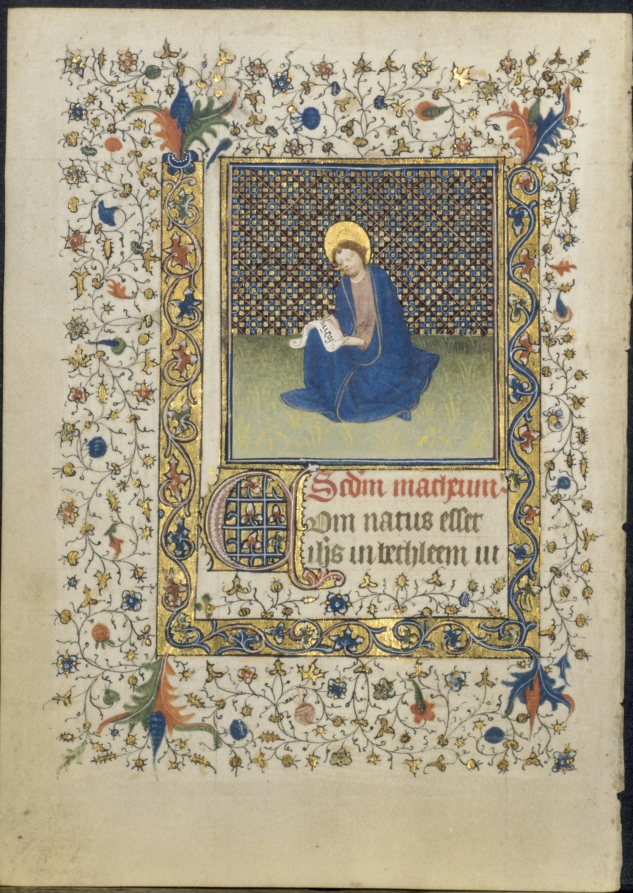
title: Leaf from a Book of Hours: St. Matthew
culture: France, Paris (?), 15th century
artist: follower of Limbourg Brothers (Netherlandish)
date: c. 1415–20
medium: ink, tempera and gold on vellum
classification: Manuscript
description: The style of this miniature can be linked to the Limbourg Brothers, celebrated Dutch miniature painters who were active in France, particularly Burgundy. They are known to have first worked for Philip the Bold, duke of Burgundy, and later for Duke Jean de Berry. The palette of this miniature, with its ultramarine blues, soft pink, and pale green, as well as the crisp geometric pattern behind the figure, is typical of the Limbourgs’ work. In a book of hours, this miniature would have introduced the start of the gospel lessons.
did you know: This miniature would have marked the beginning of the gospel hours in a book of hours.